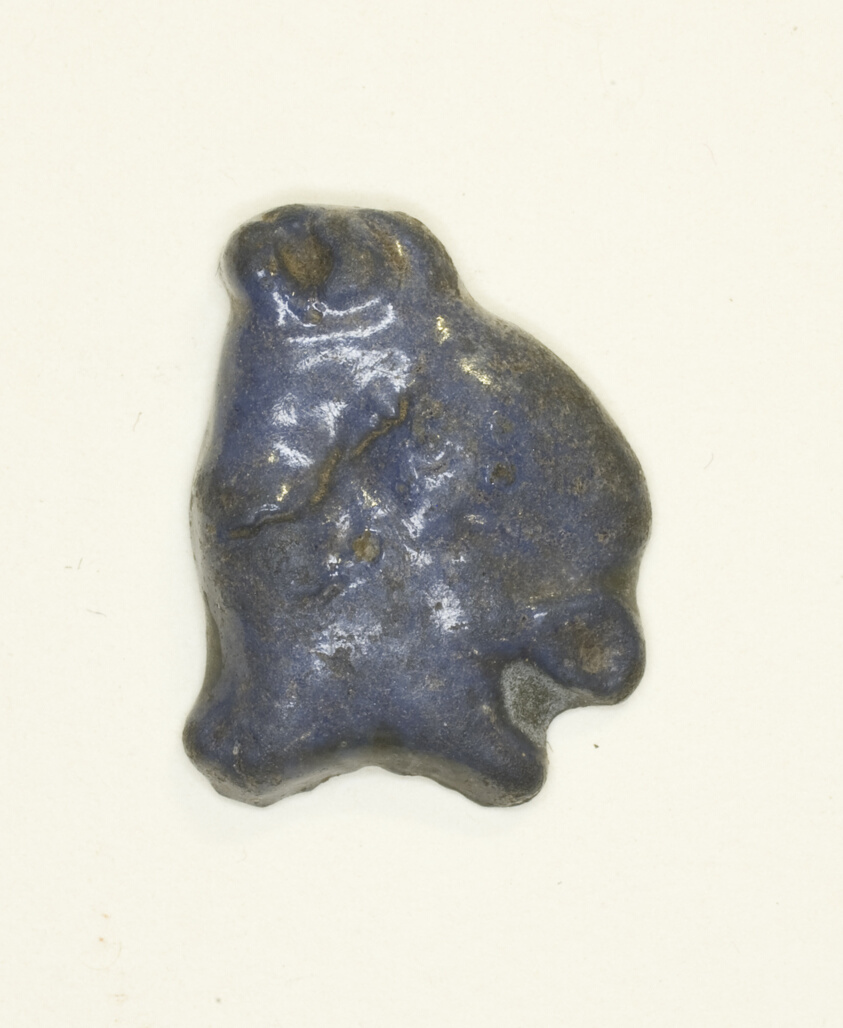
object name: Costume and Accessories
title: Foundation Deposit: Ox Head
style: new kingdom, twentieth dynasty, nineteenth dynasty, eighteenth dynasty, egyptian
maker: Egyptian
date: New Kingdom, Dynasties 18–20 (about 1550–1069 BCE)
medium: Faience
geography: Egypt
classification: amulet; votive offering; ancient art; faïence (composite material)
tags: cows, animals, sacrifice, food